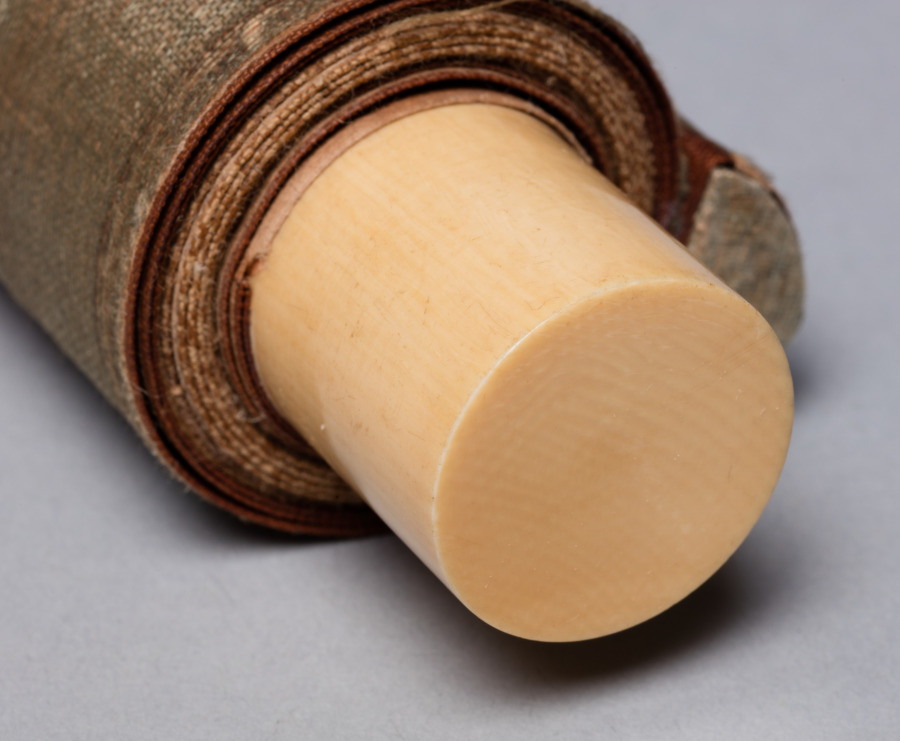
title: Hanshan and Shide (Kanzan and Jittoku)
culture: Japan, Muromachi period (1392–1573)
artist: Shikibu Terutada (Japanese, active mid-1500s)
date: mid-1500s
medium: Fan-shaped painting mounted as hanging scroll; ink and gold on paper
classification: Painting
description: These three fan-shaped paintings, now mounted as individual hanging scrolls, were once part of a set of 20 mounted on a folding screen. They portray the Chinese subjects, from left to right, of the scholar-official Pan Lang, Hanshan reciting his poetry to Shide, and a duck in flight above reeds. Pan Lang grew so fond of the mountain in his place of exile that when he was ordered back to the capital, he rode backward on his donkey so he could see it until it receded into the distance. Hanshan and Shide worked in the kitchen of a Zen monastery, but were actually reincarnations of the bodhisattvas Manjushri and Samantabhadra. The combination of a mandarin duck and reeds may have signified a level of attainment in Chinese civil service exams. All three paintings bear the seal of the Kantobased artist Shikibu Terutada. Shikibu was familiar with Kano school painting, but he also modeled his early style after that of the prominent Kanto-based Kenkō Shōkei (active about 1470–after 1523).